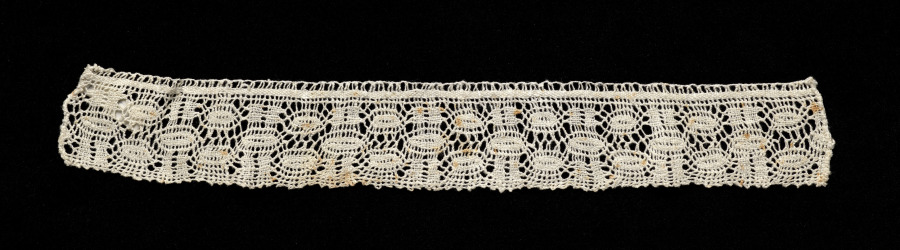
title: Lace Insertion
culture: Italy, Abruzzi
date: 1700s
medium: Bobbin lace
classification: Lace